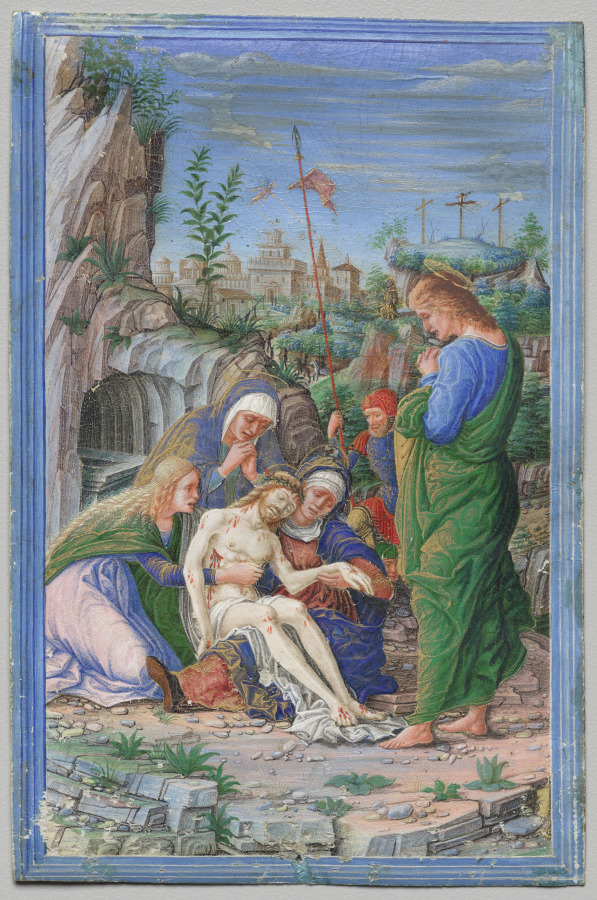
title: Single Leaf from a Book of Hours: Pieta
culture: Italy, Verona(?), 15th century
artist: attributed to Francesco dai Libri (Italian, 1452–1506)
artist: after Andrea Mantegna (Italian, about 1431–1506)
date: c. 1475–85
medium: tempera and gold on vellum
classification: Manuscript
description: One section of a book of hours is known as the Prayers to the Virgin. Dedicated to the Virgin Mary, this group of prayers is written in the first person singular, which allowed readers to insert themselves into the prayer. A reader would begin by calling upon the Virgin Mary and Saint John, with whom they would plead, as saints were considered intercessors who could emphasize a supplicant’s faithfulness. Plaintive or urgent in tone, these prayers are considered some of the most moving texts in books of hours. To accompany them, illuminations often show the Virgin and Child or the Pietà, the Virgin cradling the dead body of Jesus after its removal from the cross.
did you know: All books of hours contain the same basic sections, the order of which can shift, and individual prayers can vary, sometimes significantly, from region to region.